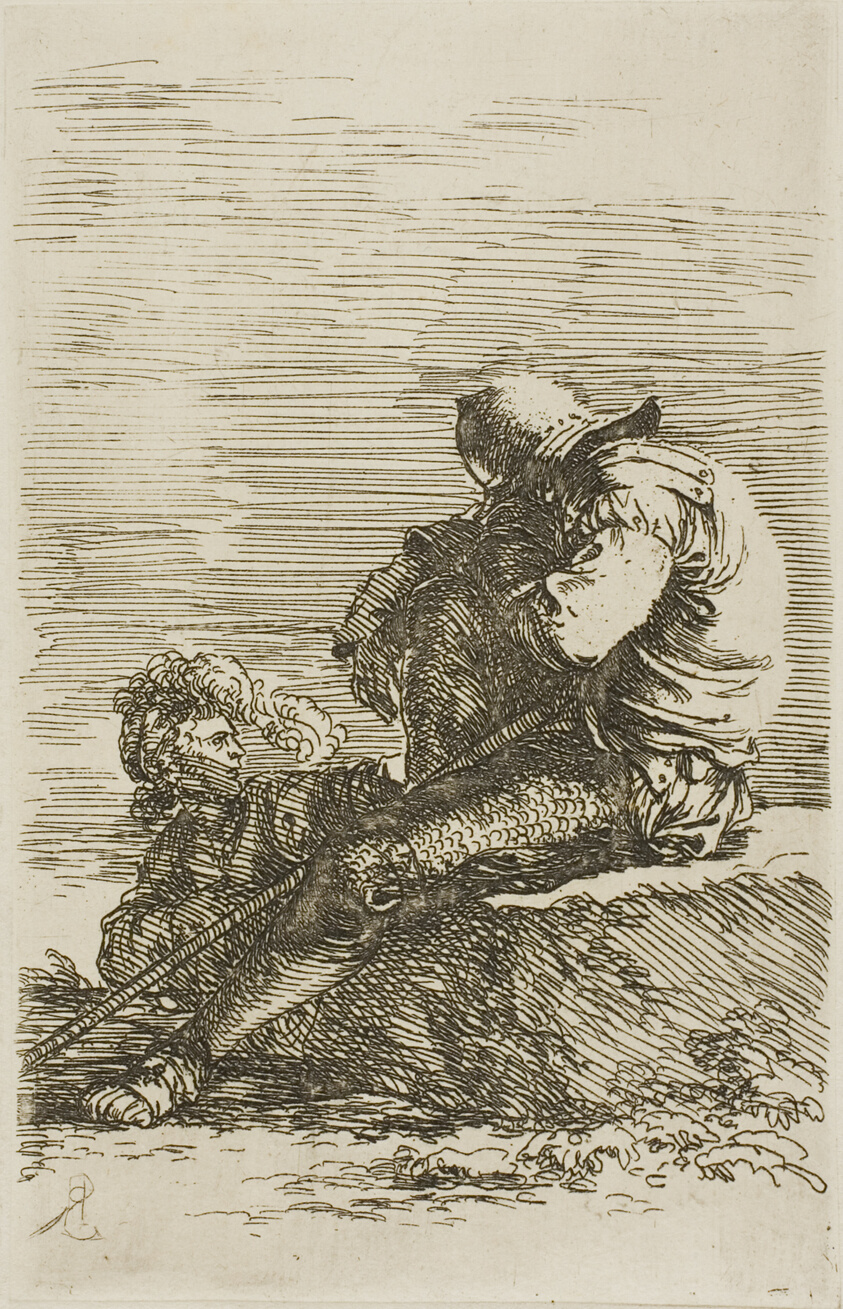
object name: Print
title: Two warriors, one seated asleep on a foreground rock, from Figurine series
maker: Salvator Rosa (Italian, 1615-1673)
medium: Etching on ivory laid paper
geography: Italy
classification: etching; print; prints and drawing